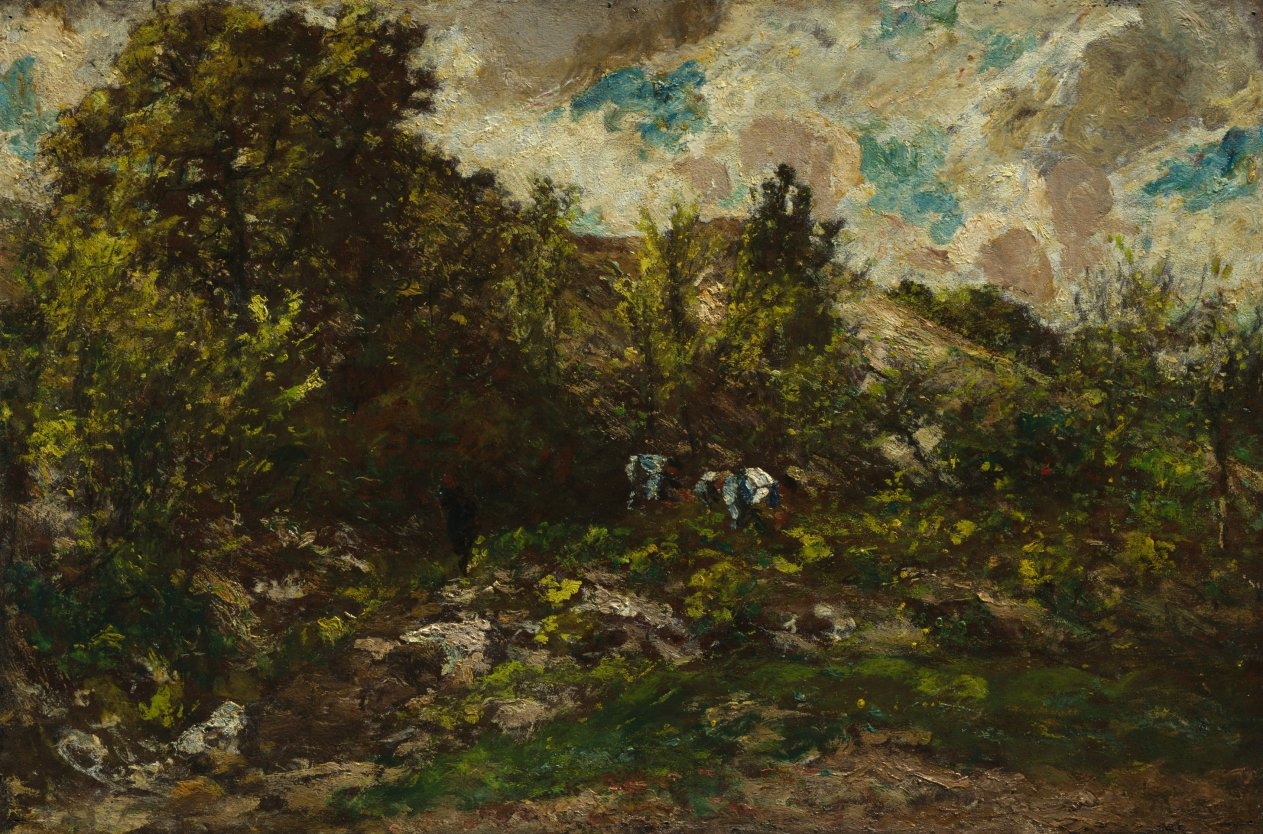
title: Autumn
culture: France, 19th century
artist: Adolphe Monticelli (French, 1824–1886)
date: c. 1867–1869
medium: oil on wood panel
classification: Painting